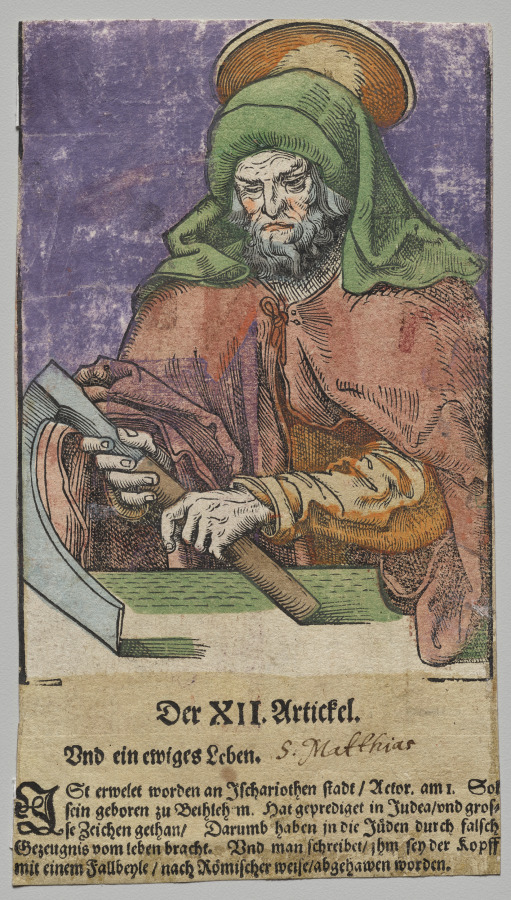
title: Matthias from Christ, the Apostles, and Saint Paul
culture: Germany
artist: Lucas Cranach the Elder, After (German, 1472–1553)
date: 1563/64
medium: Woodcut with letterpress text, hand colored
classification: Print